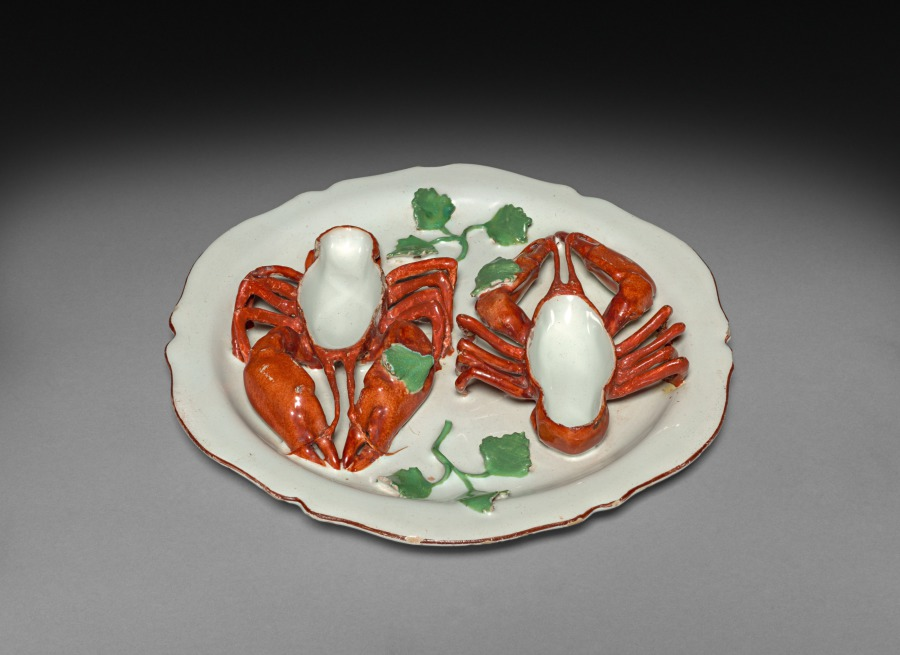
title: Plate with Crayfish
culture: France, Strasbourg, 18th century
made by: possibly by Strasbourg Factory (France)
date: 1750–1775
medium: faience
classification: Ceramic